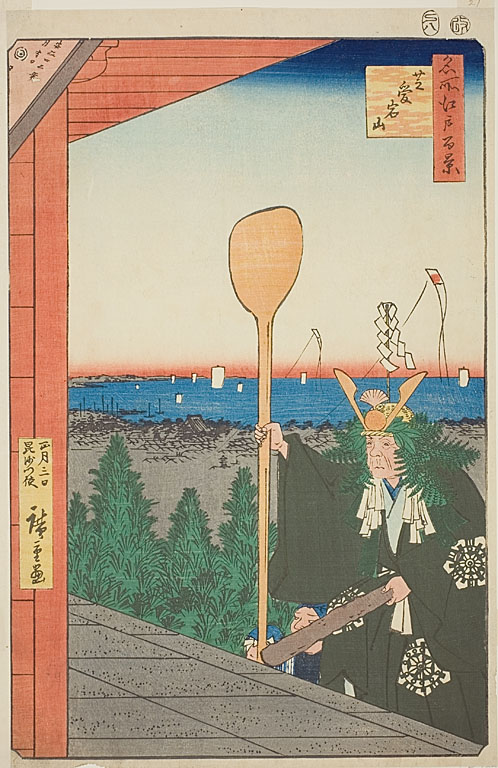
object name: Print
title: Mount Atago, Shiba (Shiba Atagoyama), No.21 from the series "One Hundred Famous Views of Edo (Meisho Edo hyakkei)"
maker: Utagawa Hiroshige (Japanese, 1797-1858)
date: 1857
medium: Color woodblock print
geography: Japan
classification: woodblock print; print; asian art